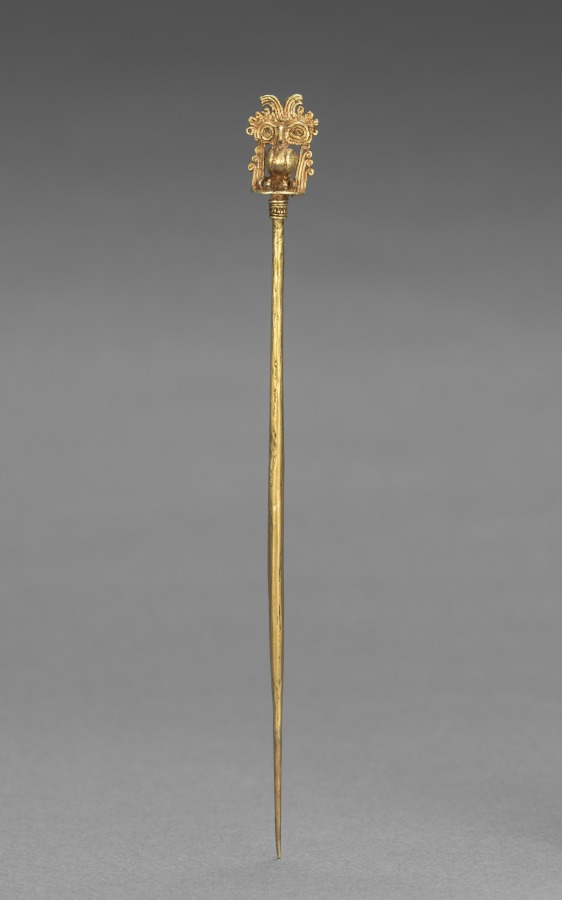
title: Lime Dipper or Pin with Owl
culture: Isthmian Region (Colombia), Calima, Yotoco period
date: 1–800 CE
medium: gold, cast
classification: Metalwork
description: An engaging miniature owl forms the finial of this dipper, which was used during coca-chewing rituals. Typically, coca leaves were chewed into a quid; then, with a dipper, lime made from powdered seashells was added to the quid to enhance the leaves' gentle stimulating effects. Contemporary natives regard coca as crucial to creating both social camaraderie and communion with supernatural forces; the same may have been true in the past.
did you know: Chewing coca leaves remains popular among indigenous communities in the Andean region.